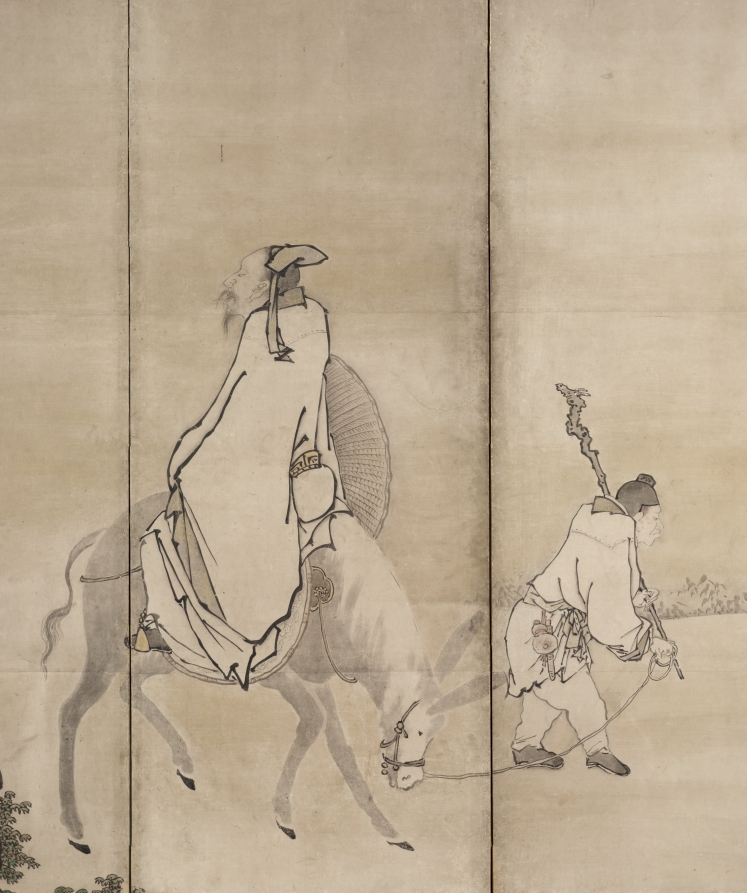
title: Pan Lang (Han Rō)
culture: Japan, Momoyama period (1573–1615)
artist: Unkoku Tōgan (Japanese, 1547–1618)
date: early 1600s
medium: one of a pair of six-panel folding screens; ink, light color, and gold on paper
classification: Painting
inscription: Each screen in the pair is impressed with two seals arranged vertically, a round "Unkoku" seal above and square "Togan" seal below.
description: This is one of the pair of screens depicts episodes from the stories of famed Song-dynasty poets Su Shi of the 1000s and Zhou-dynasty official Pan Lang of the 900s. Both men were banished by their rulers for their perceived missteps. Su Shi’s comments on a series of economic reforms were seen as criticism of the emperor. Pan Lang composed an ill-advised verse about one of the king’s horses. In this screen Pan rides backward on his donkey as he returns from exile so that he may have a last look at his now beloved Mount Hua. Su Shi, on the other screen, is shown embarking on his journey into exile. The artist of these screens, Unkoku Tōgan, was the founder of the Unkoku school of painting, which emulated the style of renowned ink painter Sesshū Tōyō (1420–1506). Tōgan was the official painter of the Mori family of what is now Yamaguchi prefecture in the south of Japan.